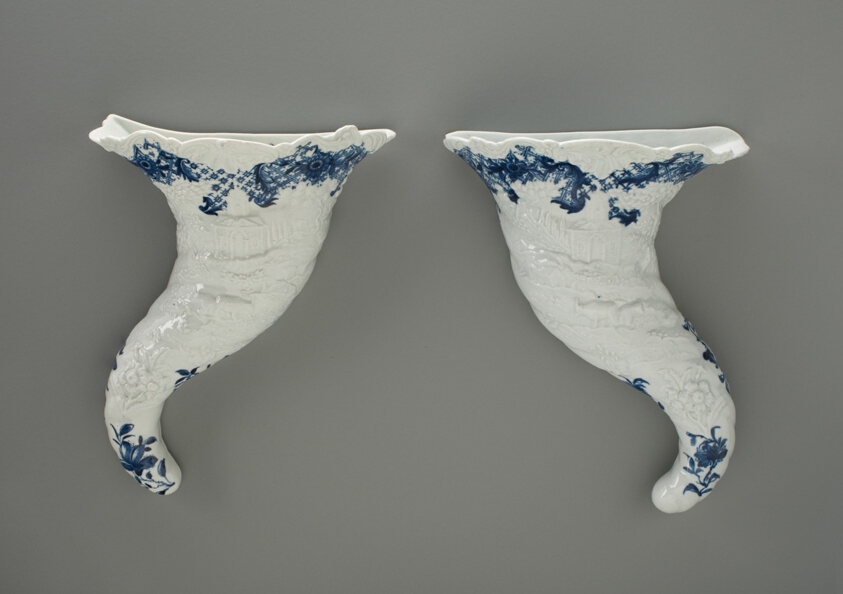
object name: Ceramics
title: Wall Pocket (one of a pair)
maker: Worcester Porcelain Factory (Warmstry House Period, 1751–1783); Worcester, England, founded 1751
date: c. 1756–1758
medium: Soft-paste porcelain, underglaze blue decoration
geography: Worcester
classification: porcelain; european decorative arts; ceramics